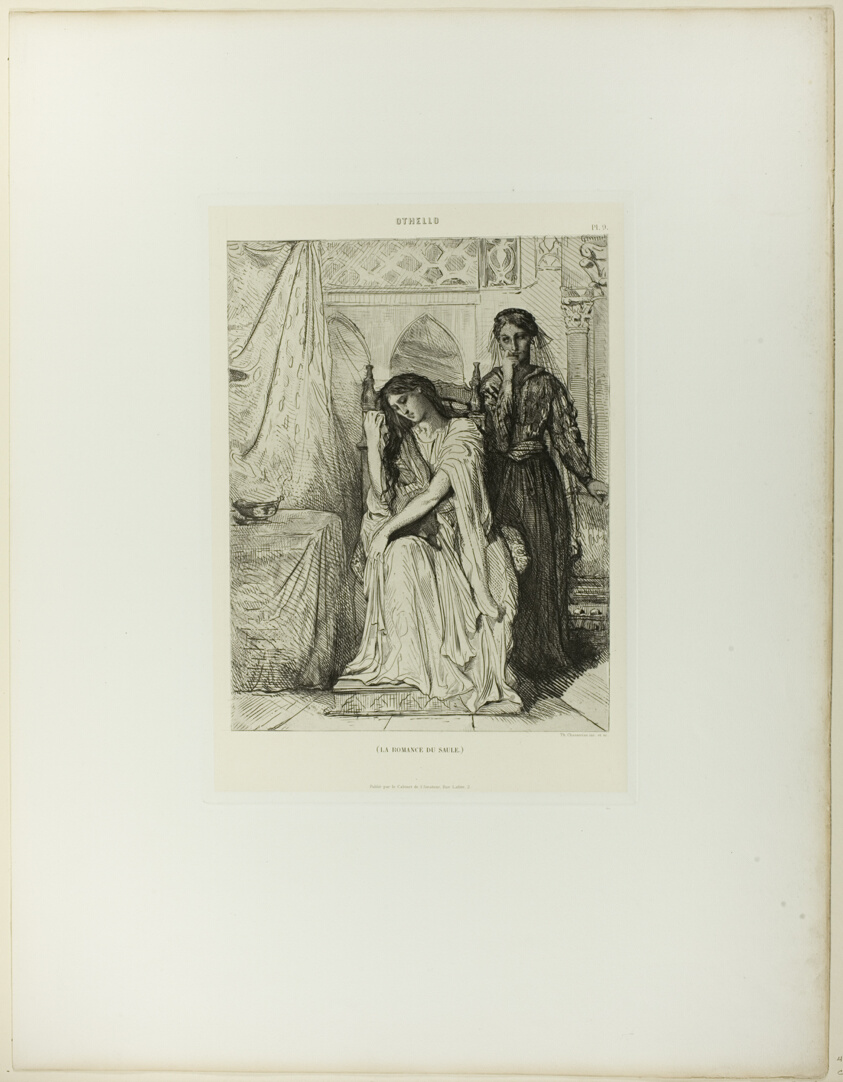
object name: Print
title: The Willow Song, plate nine from Othello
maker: Théodore Chassériau (French, 1819-1856)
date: 1844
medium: Etching, engraving, roulette and drypoint on ivory China paper, laid down on white wove paper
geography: France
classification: etching; print; prints and drawing